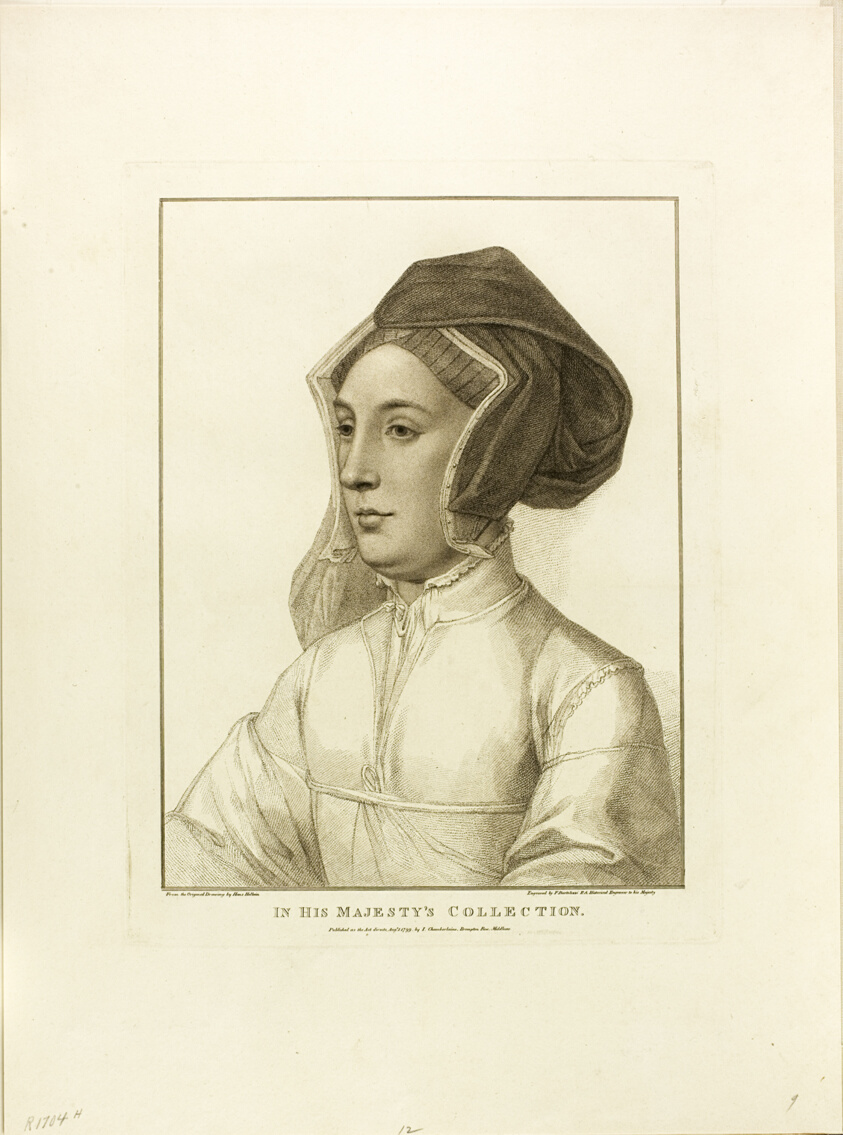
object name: Print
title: Court Lady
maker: Francesco Bartolozzi (Italian, 1727-1815); after Hans Holbein the younger (German, 1497-1543)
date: August 1, 1799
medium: Stipple engraving on cream wove paper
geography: Italy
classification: engraving; portfolio; prints and drawing; print